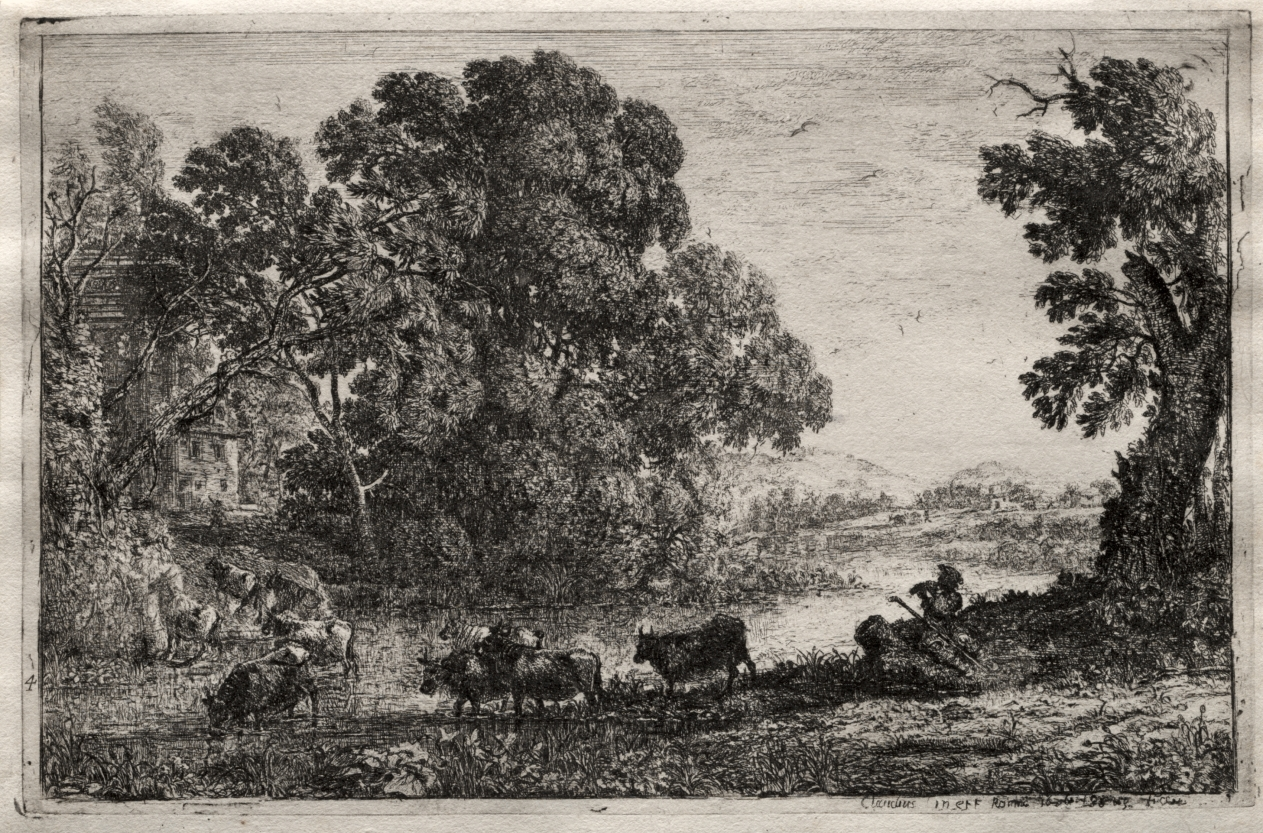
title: The Cowherd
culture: France, 17th century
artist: Claude Lorrain (French, 1604–1682)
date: 1636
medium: etching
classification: Print